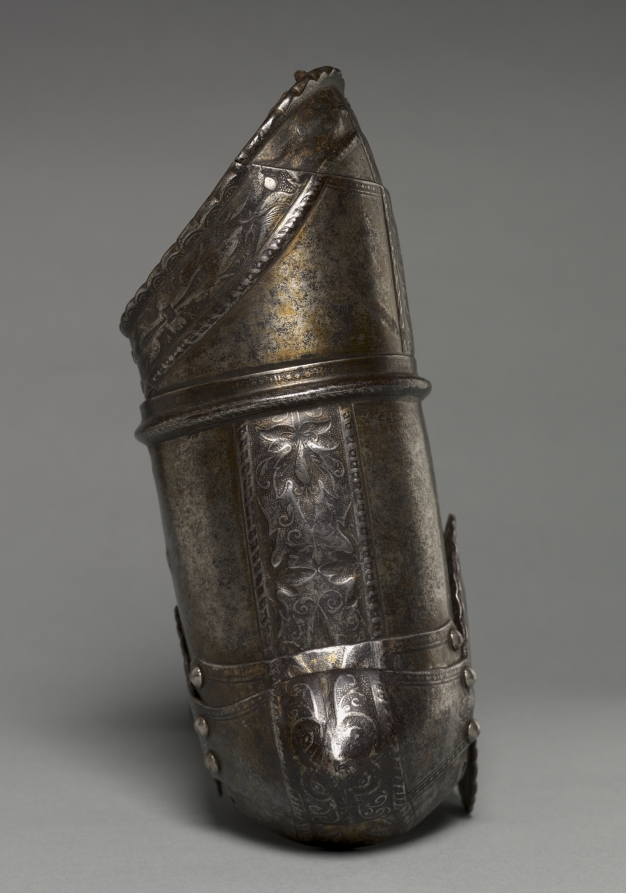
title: Right Arm Elements from a Boy's Armor (Rerebrace with Couter)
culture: Germany, Augsburg, mostly 16th Century (some modern)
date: c. 1560 (some modern)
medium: etched and lightly embossed steel with traces of gilding, leather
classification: Arms and Armor